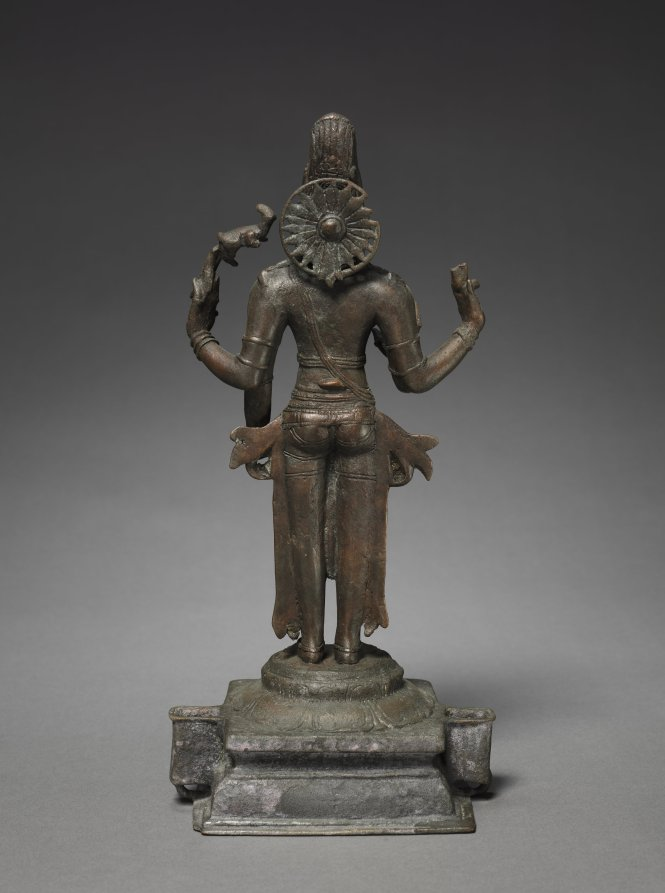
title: Shiva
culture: South India, Chola period (900–1200s)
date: 1200s–1300s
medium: bronze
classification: Sculpture